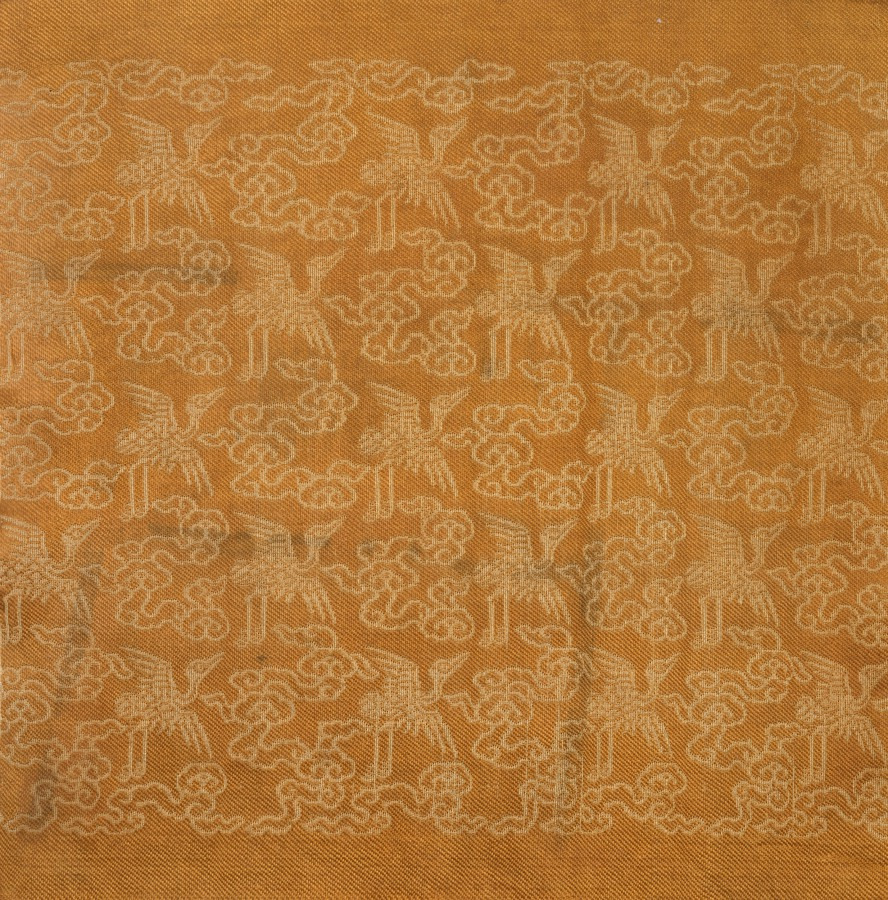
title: Textile Fragment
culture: Japan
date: 1800s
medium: silk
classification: Textile